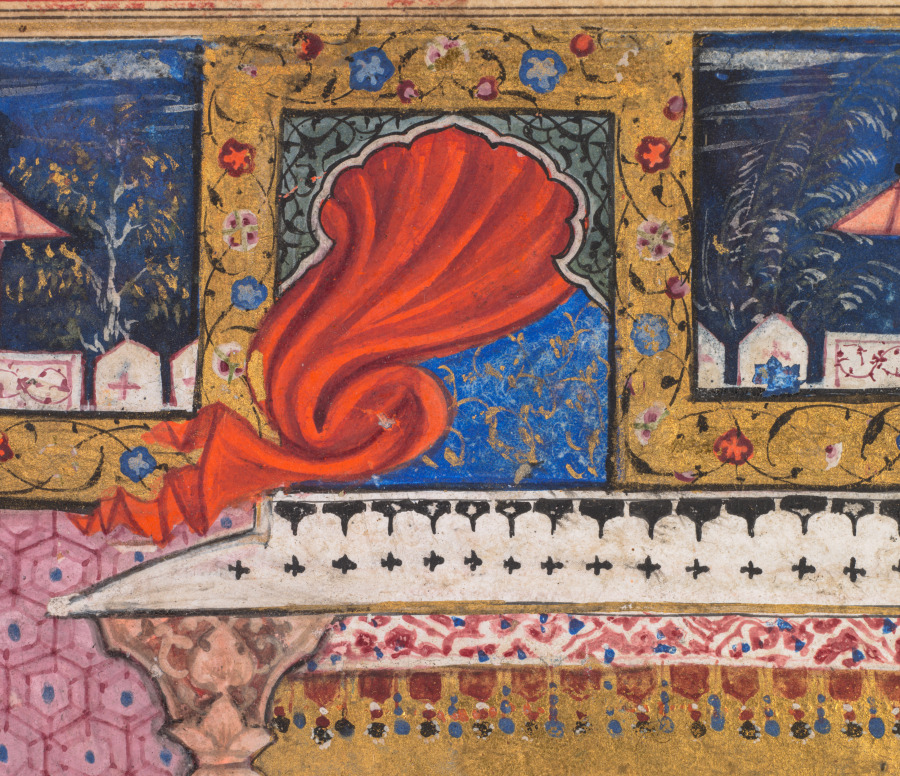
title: The hunter offers the mother parrot to the king of Kamarupa, from a Tuti-nama (Tales of a Parrot): Fifth Night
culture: Mughal India, court of Akbar (reigned 1556–1605)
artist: Basavana (Indian, active c. 1560–1600)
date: c. 1560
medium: gum tempera, ink, and gold on paper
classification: Painting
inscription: 'amal basāwan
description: The king of Kamarupa, which ironically means “body of erotic love,” had leprosy. The hunter brought the captured mother parrot to the king, assuring him that the bird knew a cure. The lavish use of gold indicates that this book was a costly production. The figure of the hunter reveals the talents of the artist Basavana, whose name is written in the right margin. Draped in rustic garments shaded to appear softly flowing, the hunter bends forward with a subtle look of shrewd expectancy as the king seems ready to pay a high price for the parrot. The billowing red curtain is one of Basavana’s signature motifs. Beyond is a tantalizing glimpse of the forest to which the parrot will soon escape to rejoin her children.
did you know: This leper king ruled a territory that stretched from Bhutan to Assam and Bengal.